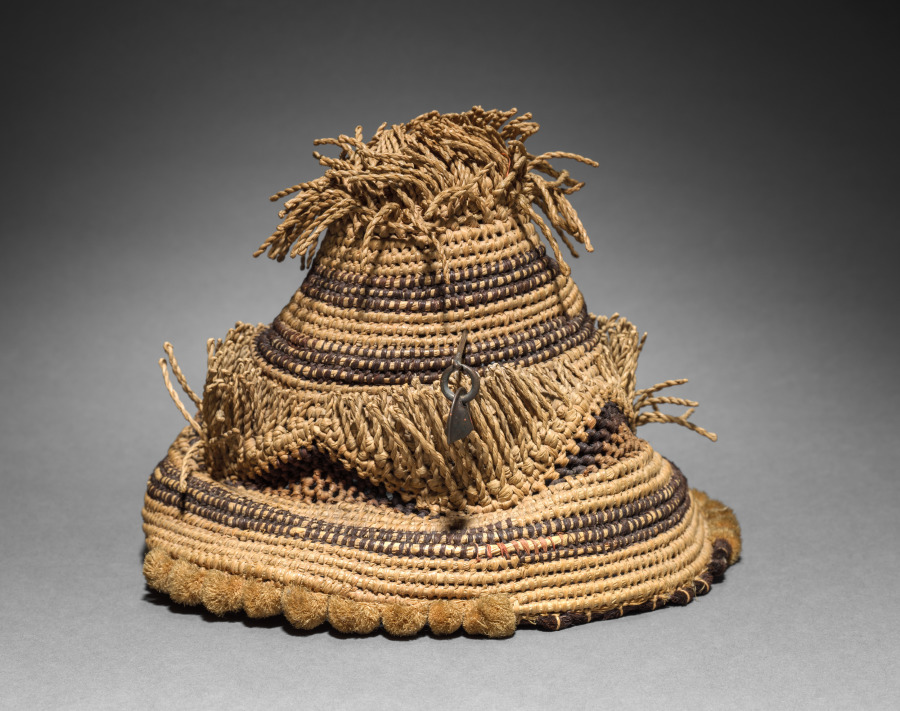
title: Hat (laket mishiing) with Pin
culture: Africa, Central Africa, Democratic Republic of Congo, early 20th century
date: early 1900s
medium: Raffia, metal, and dye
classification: Garment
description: Titled Kuba men and prominent women wear the laket, a small ornate dome-shaped hat. An essential fashion item of adult men in good social standing, it focuses special attention on the head as a significant marker of individual identity, ethnic affiliation, status, and role in society. This prestige object is secured on the crown of the head with a nine-and-a-half-inch metal pin that pierces through the hat onto a clump of hair. The laket is made from raffia palm fiber coiled into threads and woven in two alternating patterns and contrasting light and dark (dyed) wefts. There are two examples of the laket: the plain type with the flat top, and the more elaborate type called the laket mishiing.